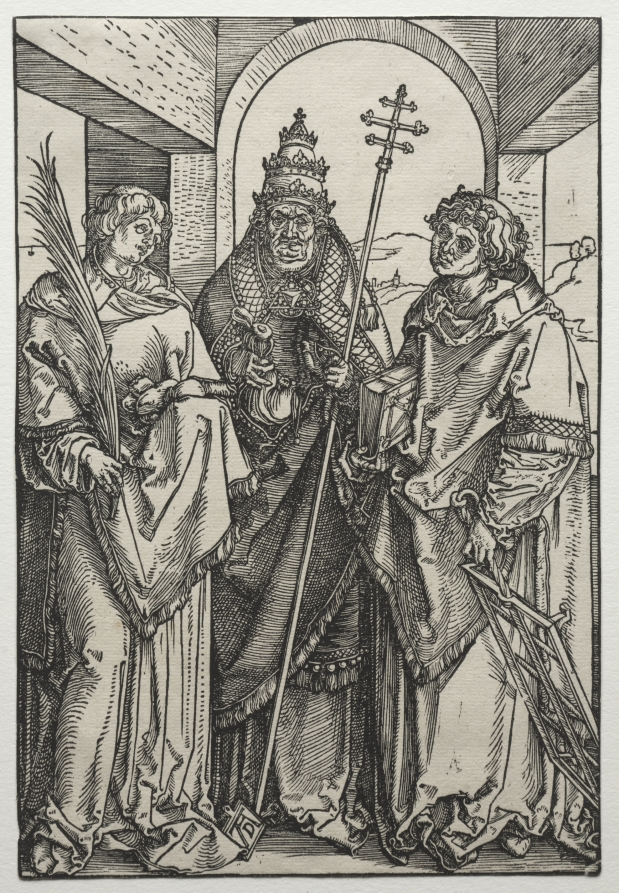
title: Saints Stephen, Sixtus and Laurence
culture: Germany, late 15th-early 16th century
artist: Albrecht Dürer (German, 1471–1528)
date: c. 1504–5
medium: woodcut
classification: Print